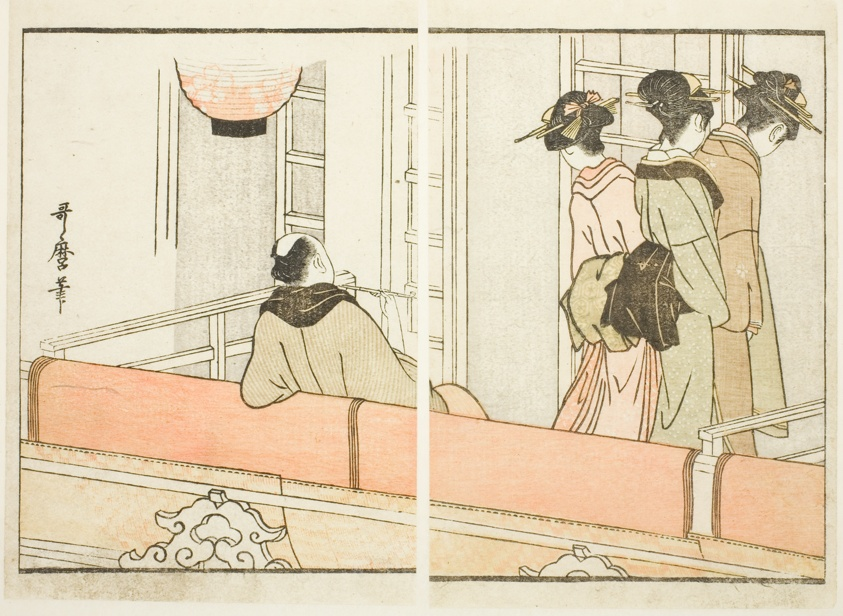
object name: Print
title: A Box at the Kabuki Theater, from the illustrated book "Guide to the Actors' Dressing Rooms (Yakusha gakuya tsu)"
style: Japanese (culture or style)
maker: Kitagawa Utamaro 喜多川 歌麿; Japanese, 1753 (?)-1806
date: spring, 1799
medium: Color woodblock print; double-page illustration from book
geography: Japan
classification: woodblock print; print; asian art